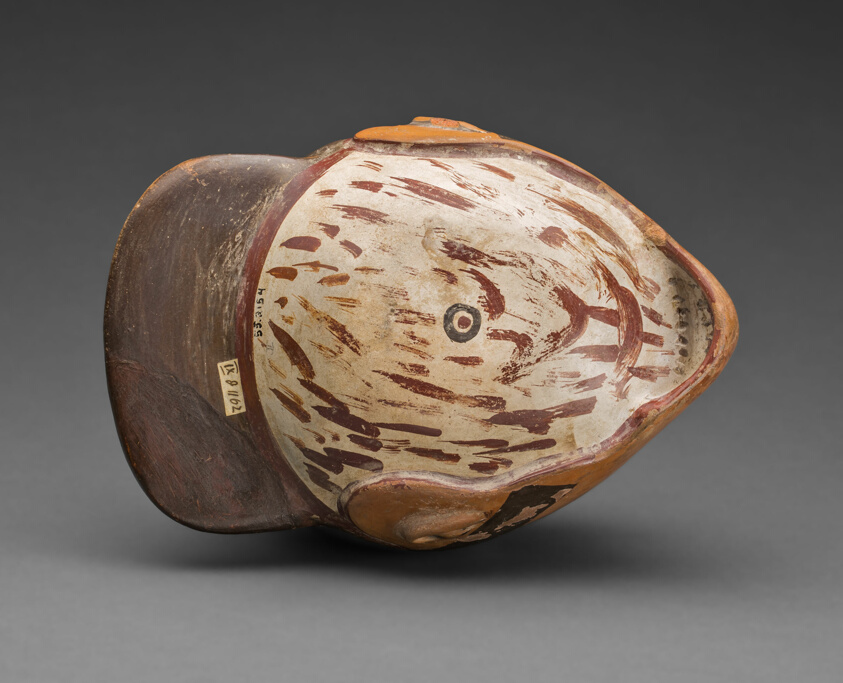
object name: Vessel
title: Bottle in the Form of a Severed Trophy Head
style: nazca, early intermediate period, Pre-Columbian, americas, andes, Arts of the Americas, andean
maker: Nazca; South coast, Peru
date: 180 BCE–500 CE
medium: Ceramic and pigment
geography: Peruvian South Coast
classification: earthenware; art of the americas; ceramics; vessel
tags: sacrifice, ritual sacrifices, rituals, death